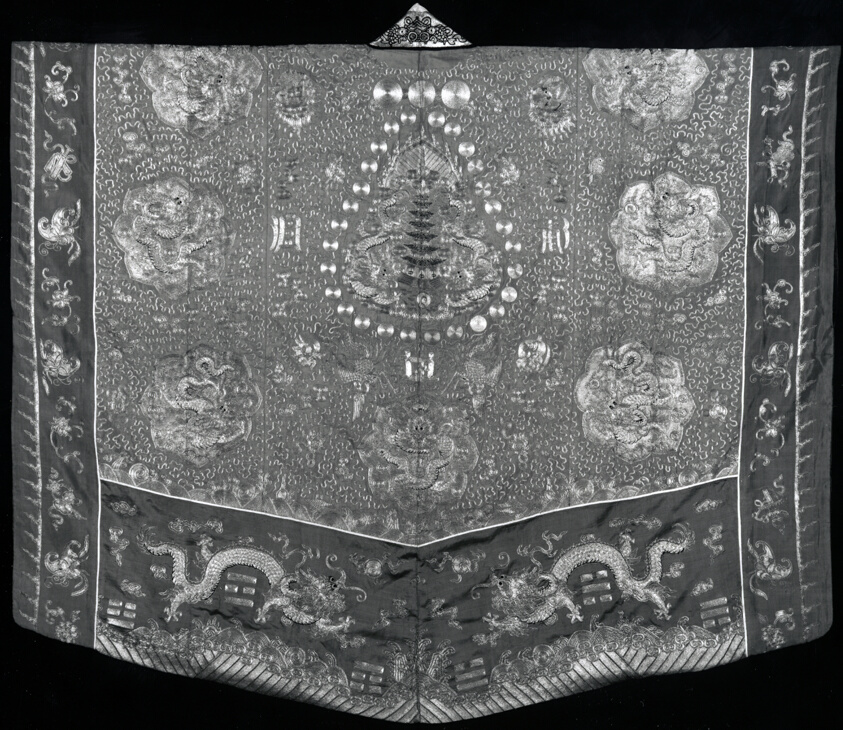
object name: Costume and Accessories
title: Vestment (For a First-degree Taoist Priest)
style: qing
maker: Han-Chinese (China)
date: Qing dynasty (1644–1911), 1850/1900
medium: Silk and cotton, plain weaves and silk, plain weave self-patterned by ground weft floats; embroidered with silk and gold-leaf-over-lacquered-paper-strip-wrapped cotton in chain, eyelet, and satin stitches; laid work and couching; collar and edge trim: silk, warp-float faced 4:1 and 6:1 satin weaves; lined with ramie, plain weave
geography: China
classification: textile; needlework (visual works); weaving; costume